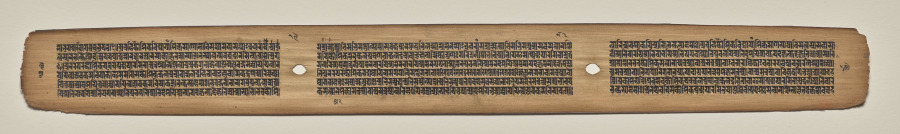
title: Text, Folio 19 (verso), from a Manuscript of the Perfection of Wisdom in Eight Thousand Lines (Ashtasahasrika Prajnaparamita-sutra)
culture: Eastern India, Bihar, Vikramashila Monastery. Painting: Nepal, Kathmandu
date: Sunday, September 14, 1119 (year 239 of the Newar Samvat in the month of Ashvina)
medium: gum tempera and ink on palm leaves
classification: Painting